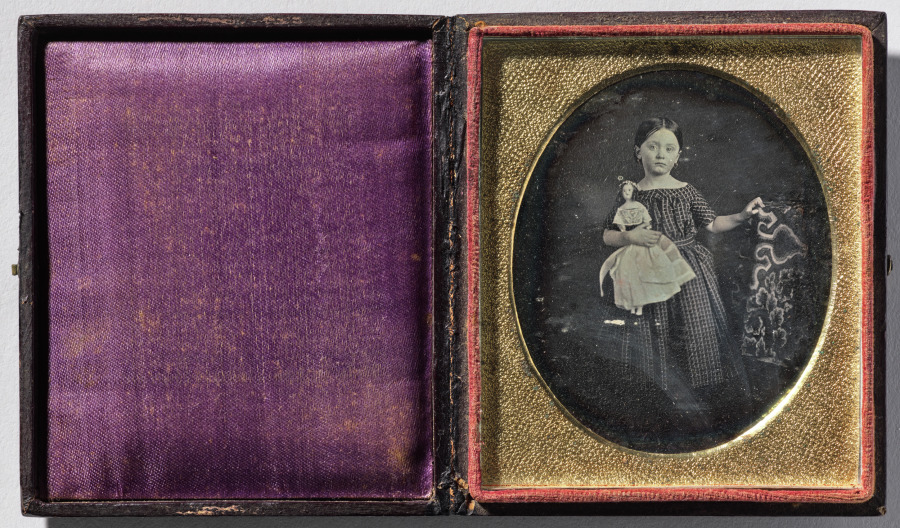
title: Girl with Doll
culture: America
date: 1850s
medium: daguerreotype, sixth plate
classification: Photograph